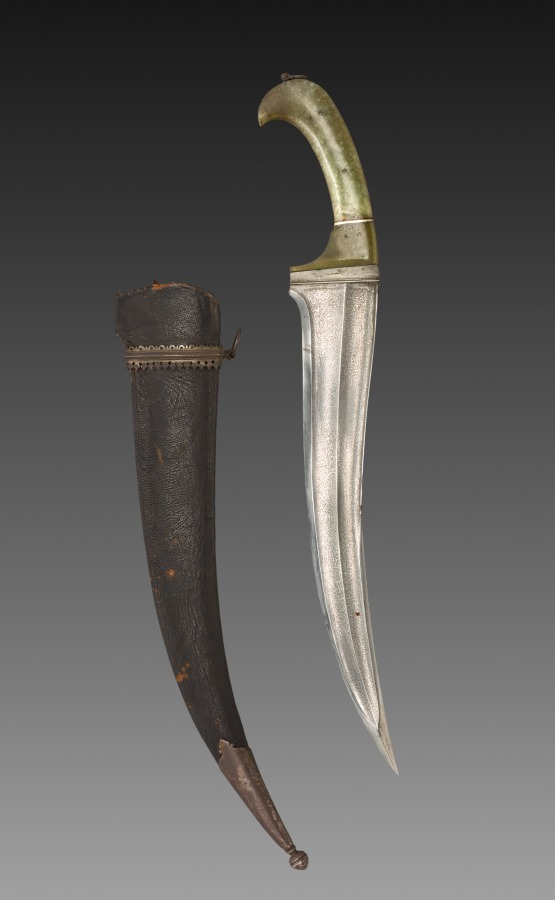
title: Knife with Jade Handle and Scabbard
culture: East India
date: c. 1750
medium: steel and jade, with leather and silver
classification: Arms and Armor